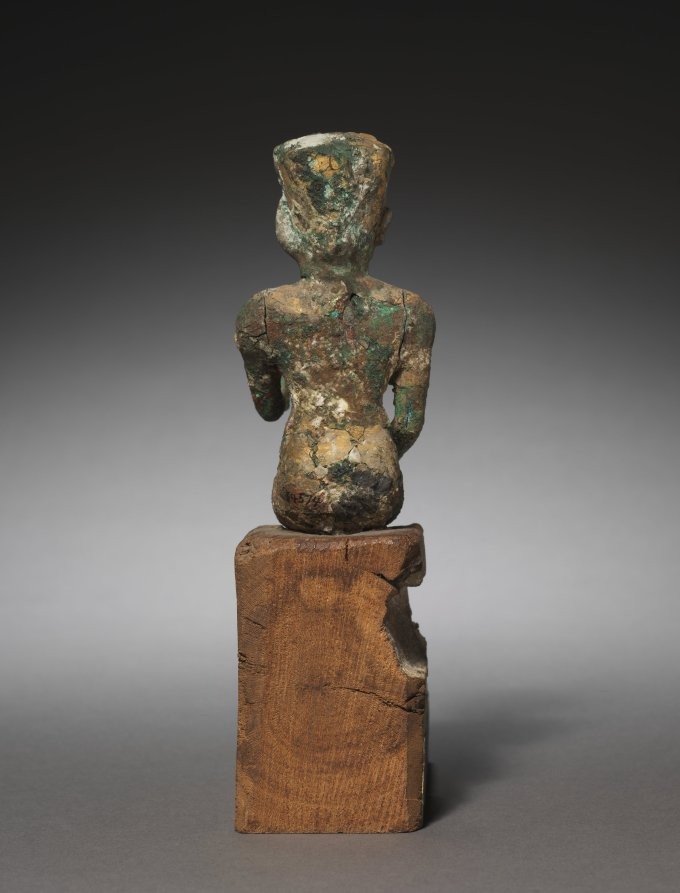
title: Statuette: Seated Amen-Ra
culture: Egypt, Late period (715–332 BCE), Dynasties 25–26(?)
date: 715–525 BCE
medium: bronze and black copper, gilded and inlaid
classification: Sculpture